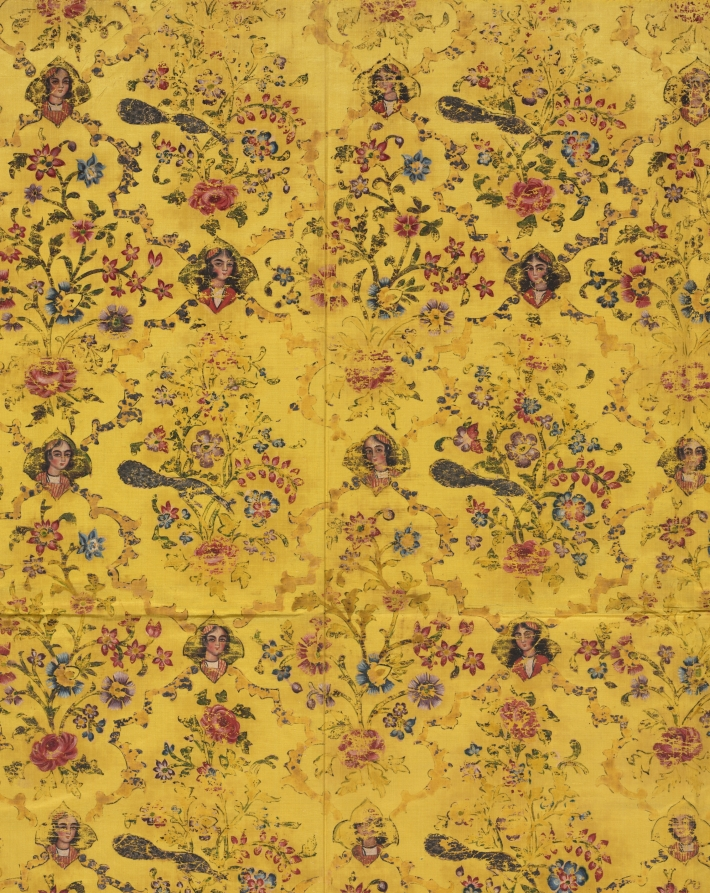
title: Wall cover with flora, peacocks, and portrait medallions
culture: Iran, Qajar period (1779-1925)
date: 1800s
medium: taffeta, hand-painted, block-printed: silk and pigments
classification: Textile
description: The European fashion of installing Chinese export silks with painted decoration as luxurious wall coverings may have inspired this exceptional Iranian silk. European engravings, which had flooded the Iranian market by the 19th century, most likely inspired the pattern. This rare silk fabric with painted figural and foliate decoration may have been a luxurious wall covering in a palace or grand mansion in the city of Kashan where mural paintings display similar 19th-century designs. Glistening silver pigment originally formed the palmette-leaf compartment outlines (now mostly deep yellow) that display colorful blossoming plants enlivened with now tarnished silver peacocks. At their junctures, portrait medallions of Iranian princesses are distinctly Qajar in attire and style, as are the composite blossoming plants.